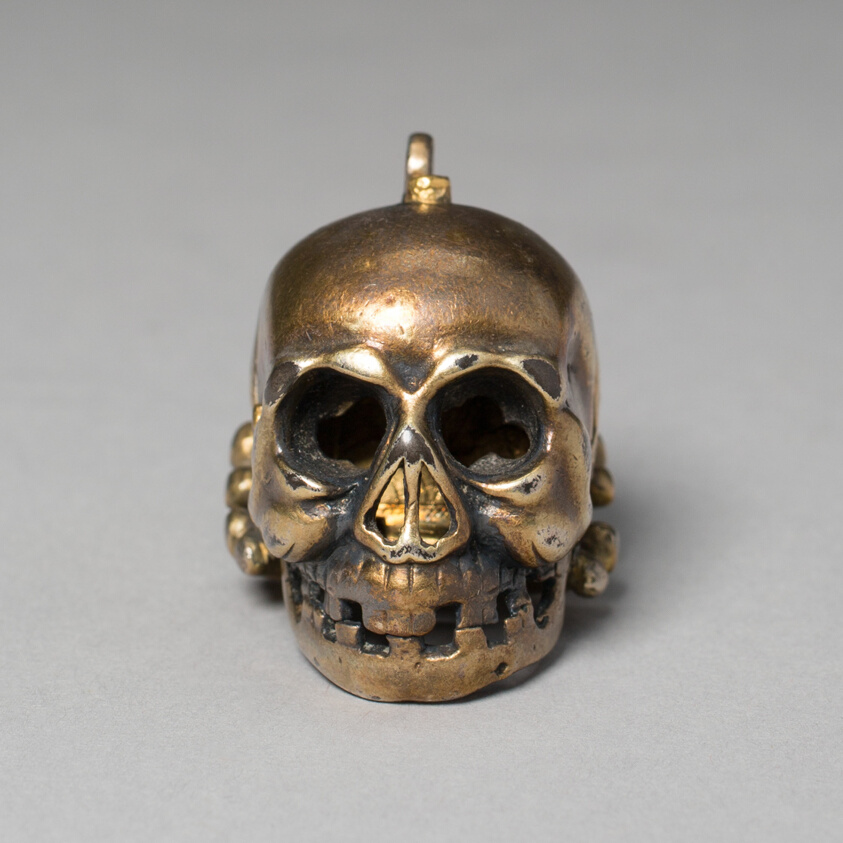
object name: Costume and Accessories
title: Spice Box Shaped as a Skull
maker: German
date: 17th century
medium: Silver gilt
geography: Germany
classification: jewelry; european decorative arts; costume